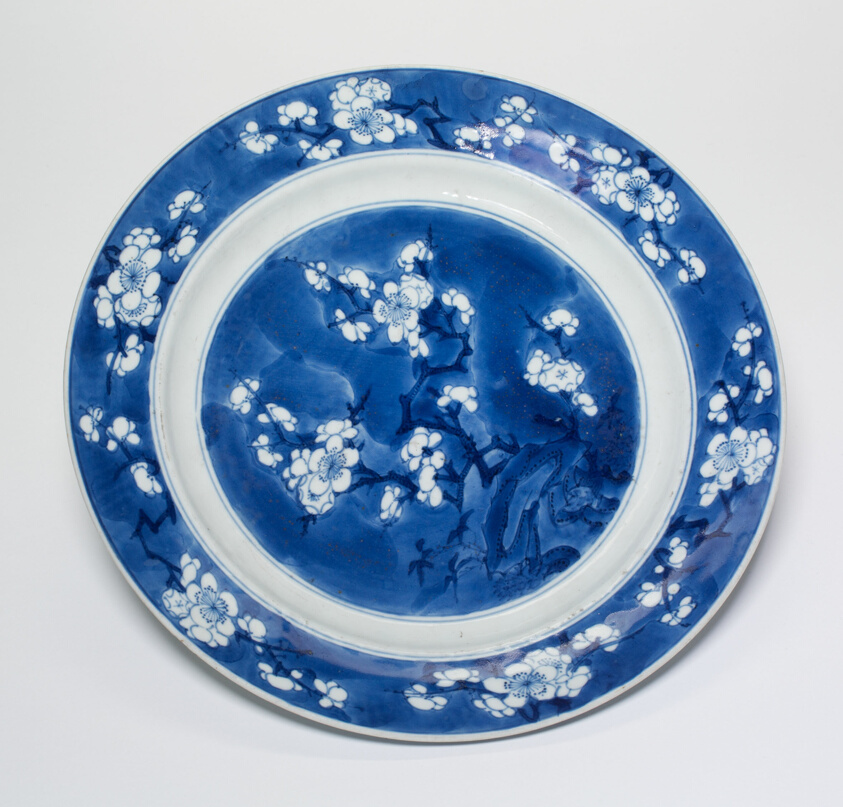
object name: Vessel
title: Dish with Plum Flowers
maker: China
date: Qing dynasty (1644–1911), late 18th/19th century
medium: Porcelain painted in underglaze blue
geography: China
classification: porcelain; asian art; ceramics